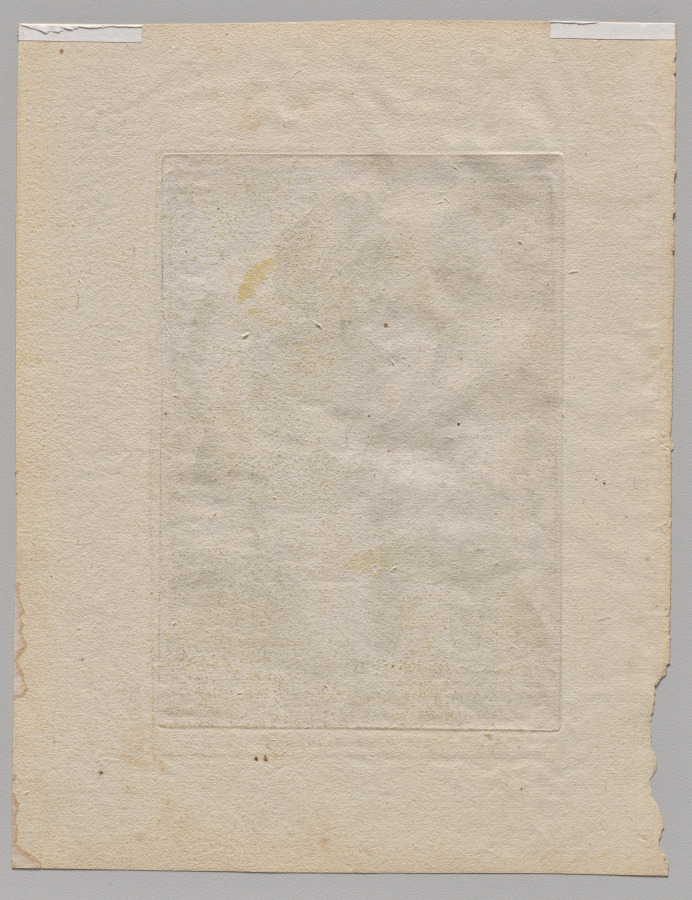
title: Plate 10: Naphtali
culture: Netherlands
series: The Twelve Sons of Jacob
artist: Jacob de Gheyn II (Netherlandish, 1565–1629)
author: after Karel I van Mander (Netherlandish, 1548–1606)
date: c. 1589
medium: engraving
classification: Print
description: In this print, biblical figure Naphtali counts with his fingers next to a stag, denoting his swiftness in battle. This is one of a series of prints depicting the twelve sons of Jacob, each with an attribute and costume that denotes his character. According to the Old Testament, Jacob blessed each of his twelve sons, prophesizing the destiny of their tribe, and assigning them a parcel of land in Canaan. The print series was made in the Netherlands in the late 16th century, a time of political struggle when Old Testament heroes were popular exemplars of fortitude and patience.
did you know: The mountain face depicted in the background of this image may refer to the tribal lands in Northern Israel granted to Naphtali by his father, Jacob, which included a mountain pass.